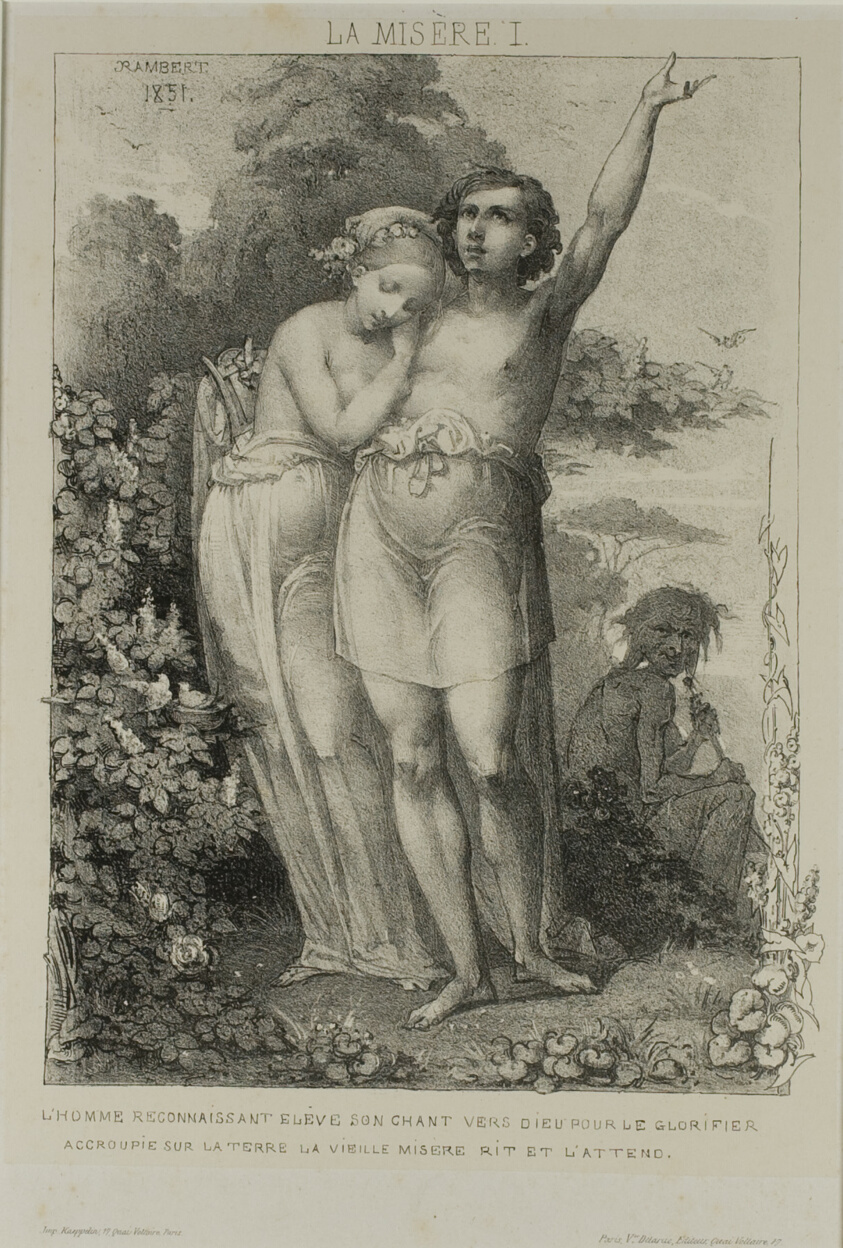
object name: Print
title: Plate One from Misery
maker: Charles Rambert (French, active 1836–1867); printed by Kaeppelin; published by Victor Delarue (French, 19th century)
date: 1851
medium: Lithograph in black on cream China paper, laid down on ivory wove paper (chine collé)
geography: France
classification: lithograph; print; prints and drawing